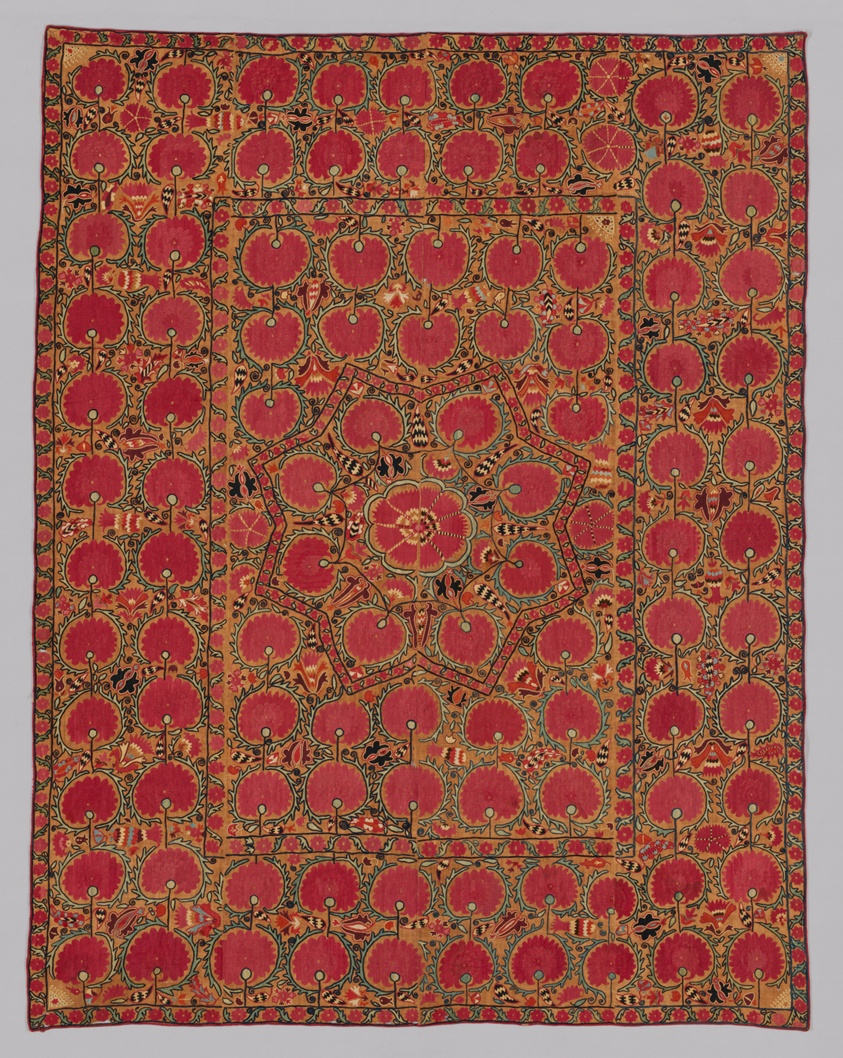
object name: Textile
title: Suzani (large hanging or cover)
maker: Uzbekistan, probably Tashkent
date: 1840/1890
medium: Cotton, plain weave, embroidered with silk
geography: Uzbekistan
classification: embroidery; textile; needlework (visual works)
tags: flowers